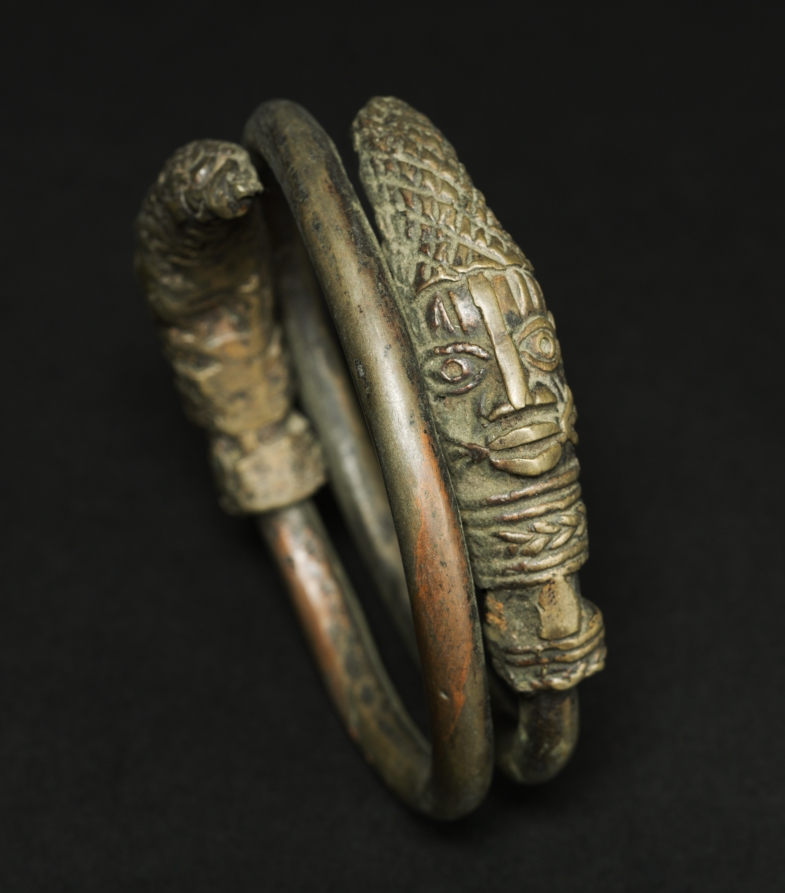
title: Hand Coil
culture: Nigeria, Benin Kingdom, Ẹdo peoples, members of the Igun Eronmwon (royal brasscasters) guild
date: 1800s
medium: Copper alloy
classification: Implements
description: While this looks like a bracelet, it wasn’t worn around a wrist. A chief or titleholder grasped this “hand coil” vertically during the annual Iguẹ festival, during which such men reaffirm their relationship to the Ọba, whose mystical powers are strengthened. An image of a man’s head caps each end of the thick, twisted metal. Repeated human touch rubbed the undecorated lengths bright and shiny. Though small, the coil’s detail is enormous: to capture it, the artist incised the designs in wax during the casting process. They show these men are elites, with necklaces, caps, and whisker-like facial markings.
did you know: This is a unique object; it was made using the lost-wax casting technique, which destroys the wax mold in the creation process.